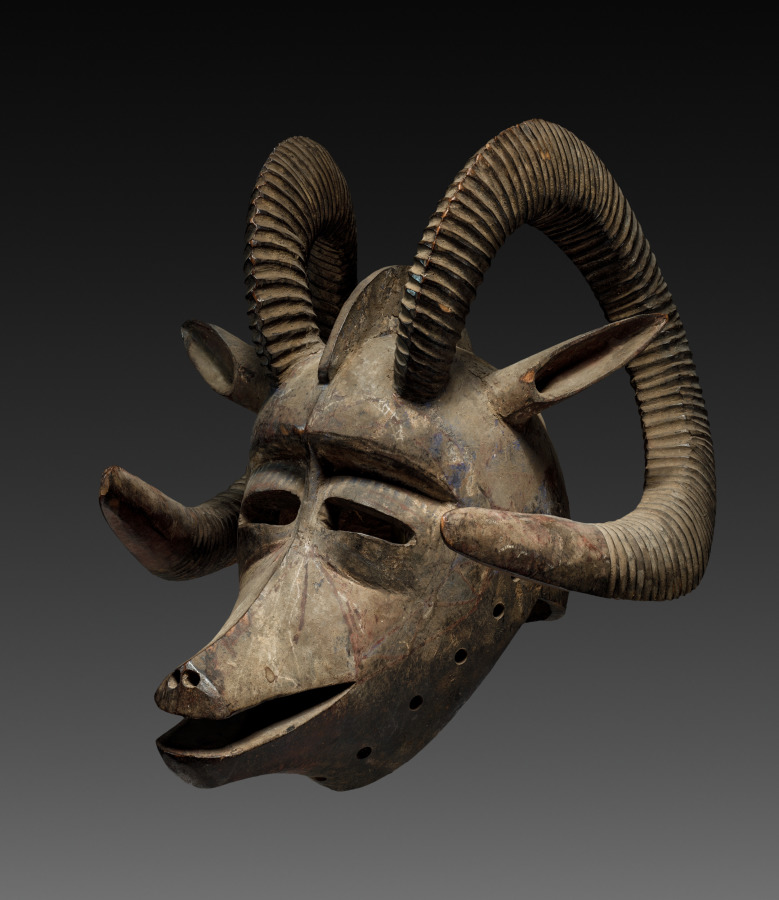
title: Ram Mask (Bolo)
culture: Africa, West Africa, Burkina Faso, Bobo-style blacksmith-carver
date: possibly early 1900s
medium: Wood and paint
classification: Mask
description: Bolo masks are primarily danced for entertainment during communal occasions like funerals, male initiations, and harvest celebrations. Comprising both animal and human features, the mask––always worn by a male dancer––refers to the cultural significance of the ram, an animal associated with male aggression across sub-Saharan Africa.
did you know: The mask was vividly painted while in use. Look closely at its surface to see traces of blue, red, and white paint.